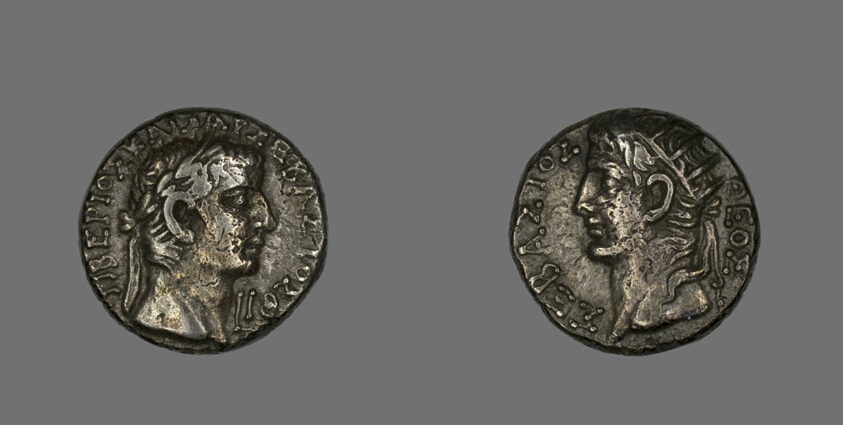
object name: Coin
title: Tetradrachm (Coin) Portraying Emperor Tiberius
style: imperial (roman), ancient, roman (ancient, style or period)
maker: Roman, minted in Alexandria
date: 32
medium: Billon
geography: Alexandria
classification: coin; ancient art; struck